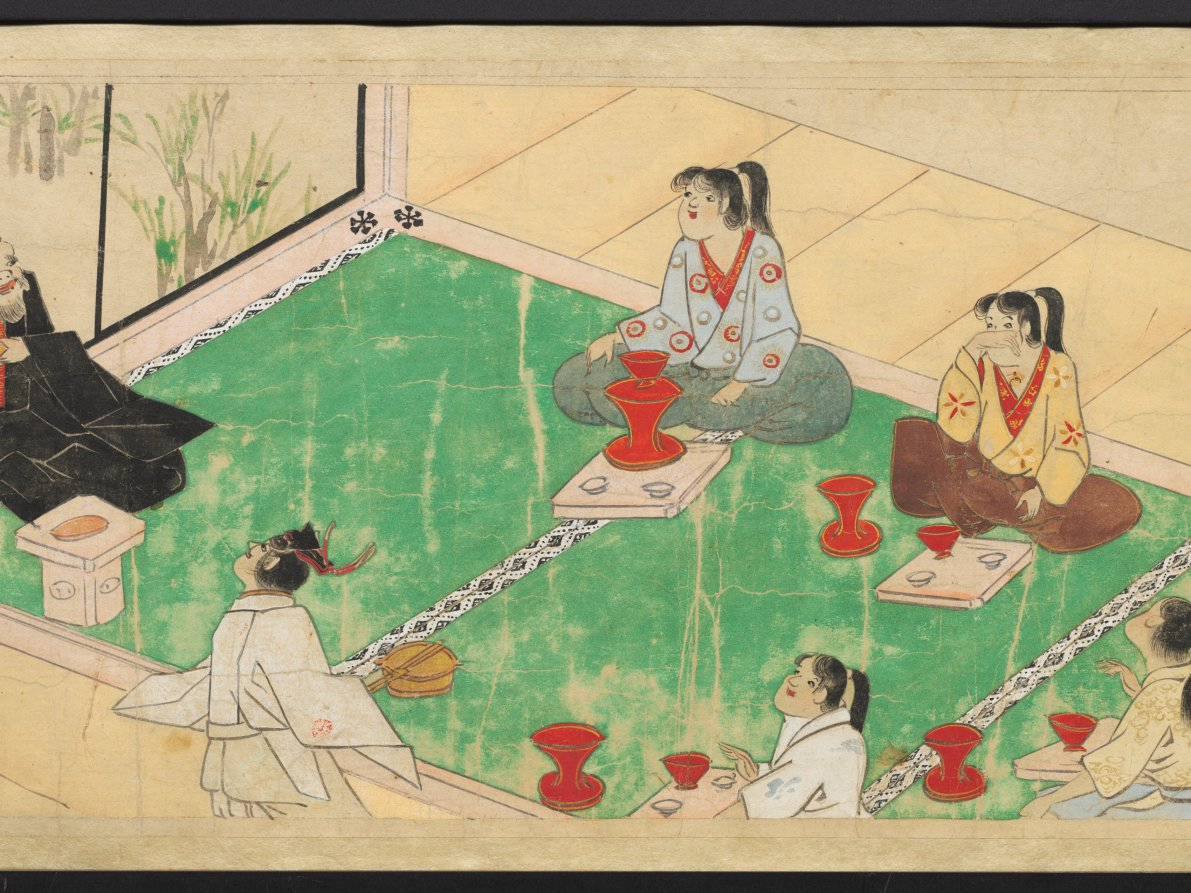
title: The Saltmaker's Story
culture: Japan, Edo period (1615–1868)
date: early 1600s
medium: One of a pair of handscrolls; ink, color, and gold on paper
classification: Painting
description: Once read and copied by girls at New Year’s celebrations and included in dowries, The Saltmaker’s Story is a rags-to-riches tale in which daughters are gifts from the gods. Despite his simple outlook, the main character progresses from humble roots as an associate at Kashima Shrine to the elite status of grandfather of the emperor through the intervention of the Kashima deity. The Saltmaker’s Story is traditionally presented in a set of three scrolls, but the text of this set has been removed by a previous owner, who remounted the illustrations as a pair. The paintings of this one take us from right to left through the second half of the tale.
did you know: This handscroll originally had texts before its paintings, but the texts were removed.